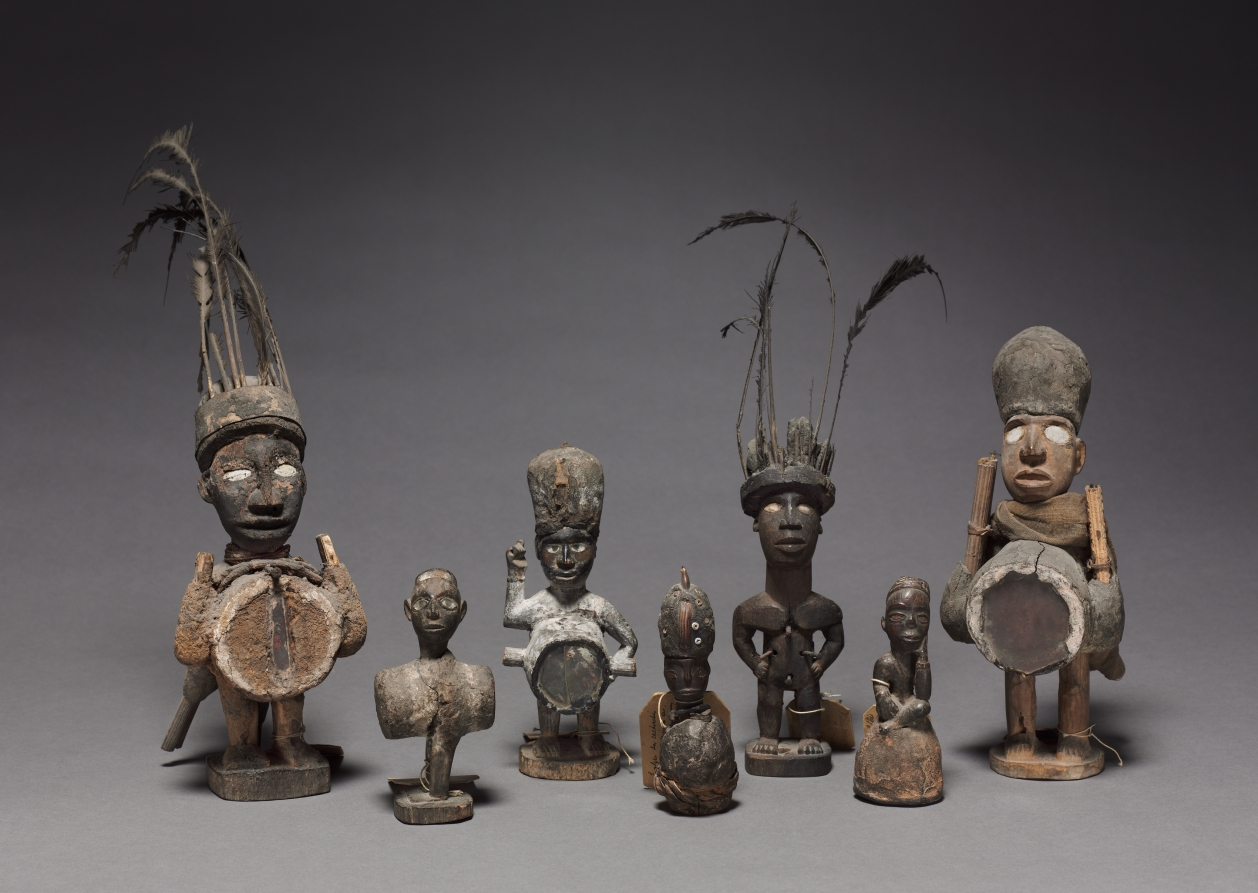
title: Power figure (nkisi)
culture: Africa, Central Africa, Republic of the Congo, Kongo-style maker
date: late 1800s-early 1900s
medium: Wood, organic materials (including resin), and metalized glass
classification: Sculpture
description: One of seven anthropomorphic figurines, these minkisi contained medicines in which an ancestral spirit was believed to reside. The medicines served a metaphorical rather than literal purpose in the resolution of conflicts among Kongo people. This figure contained white- and red-colored medicine loads on its belly and back. Its pose may refer to the nkisi’s capacity to see more than others.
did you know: The nduda minkisi were loaded with gunpowder and/or medicine to protect their owners and to shoot “witches” and other enemies.